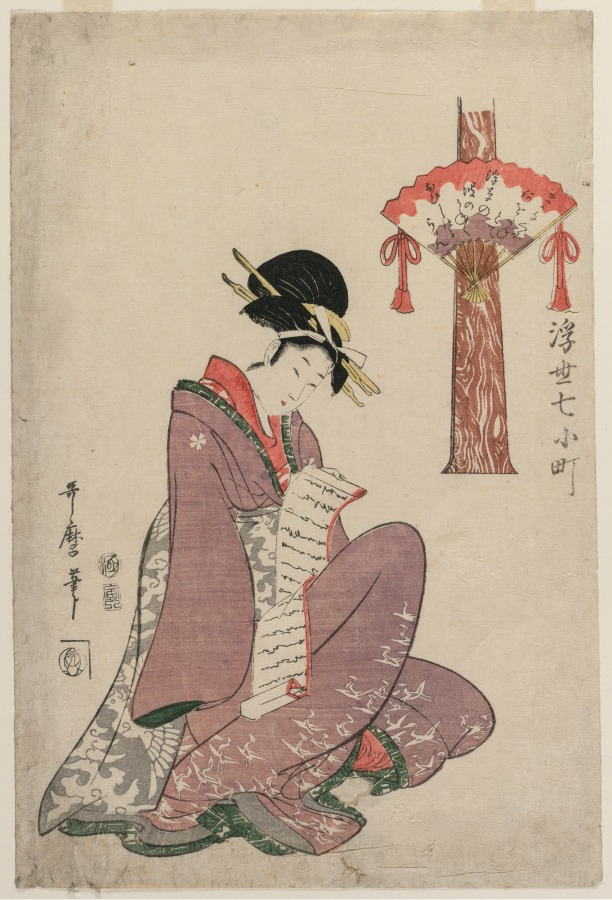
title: Woman Reading a Letter (from the series Seven Episodes in the Life of Komachi in the Floating World)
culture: Japan, Edo period (1615–1868)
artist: Kitagawa Utamaro (Japanese, c. 1754–1806)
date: 1806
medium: color woodblock print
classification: Print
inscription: Signature: Utamaro kitsu Publisher: Tsuruya Kiemon (emblem) Censorship Seal: kiwame